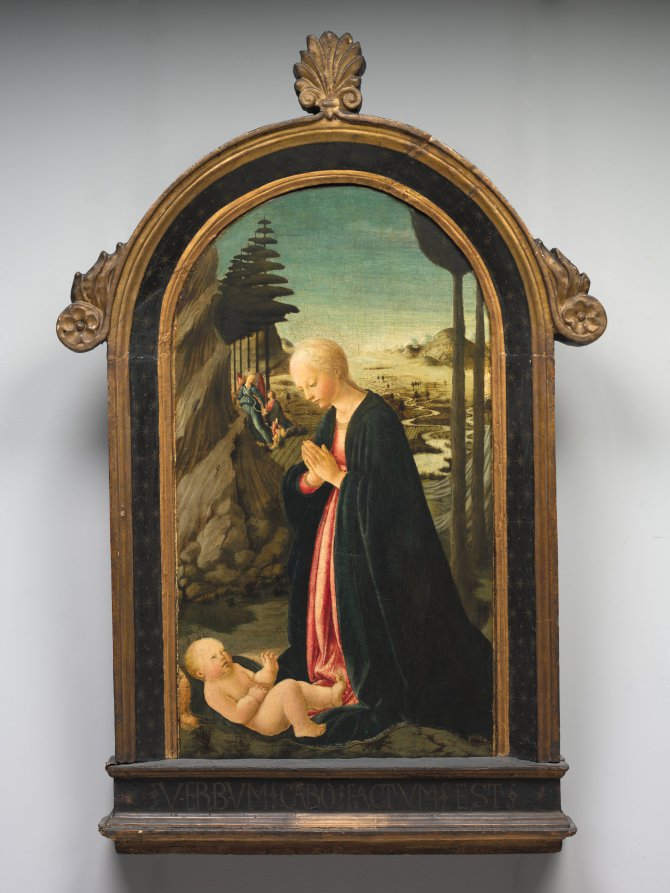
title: Madonna and Child with Tobias and the Angel Raphael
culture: Italy, 15th century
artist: Francesco Botticini (Italian, c. 1446–1497)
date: c. 1470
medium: tempera on poplar panel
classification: Painting